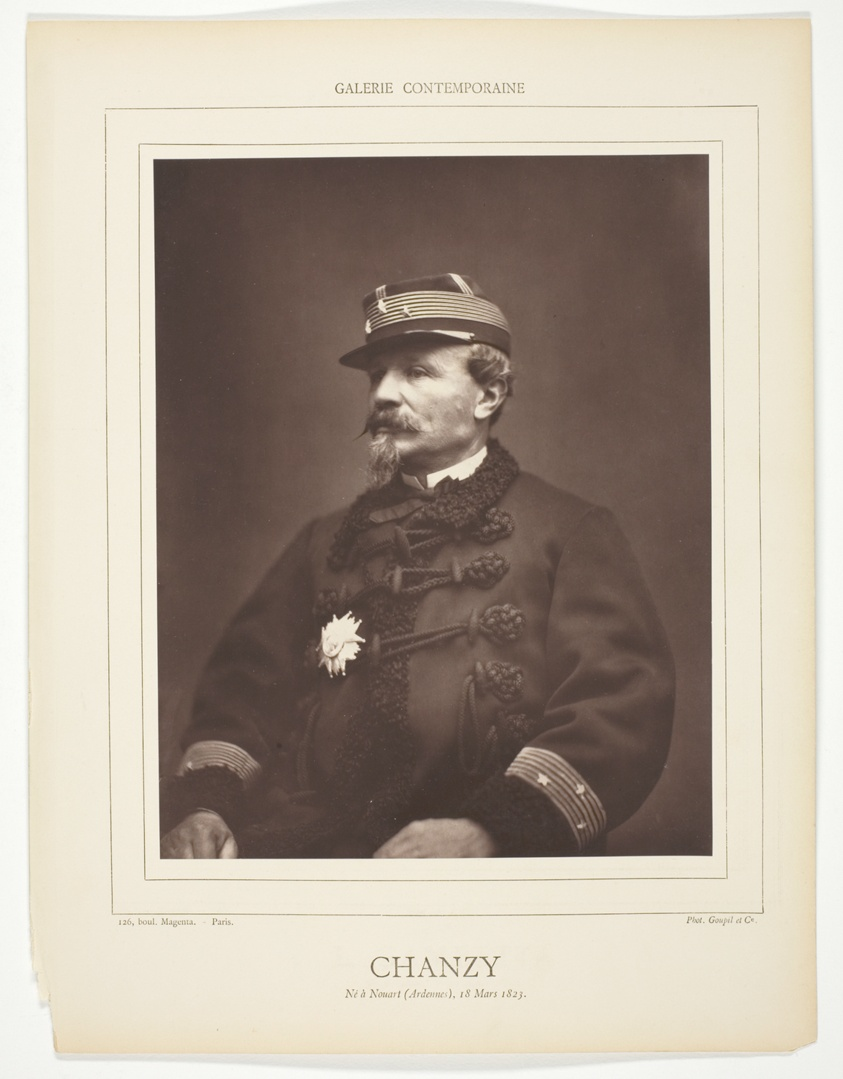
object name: Photograph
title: Chanzy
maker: Goupil et Cie; French, active after 1855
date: 1975/78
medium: Woodburytype, from the periodical “Galerie Contemporaine Littéraire, Artistique” (1878), volume 6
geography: France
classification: woodburytype; photomechanical process; photography; photograph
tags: Collected by Hugh Edwards, Contemporaine Littéraire